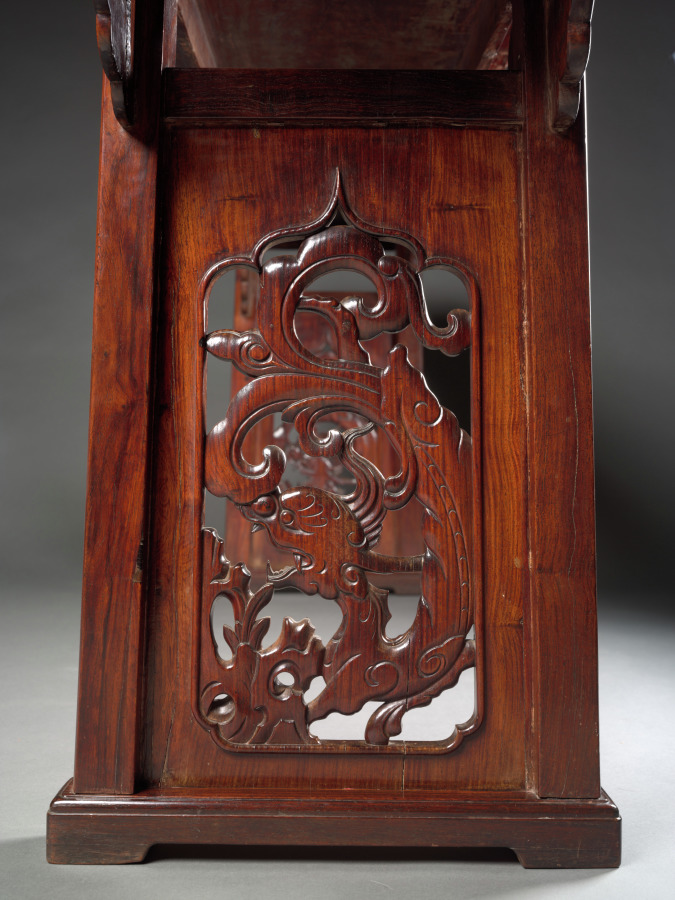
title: Side Table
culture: China, Ming dynasty (1368-1644) or Qing dynasty (1644-1911)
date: 1600s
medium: Rosewood (huanghuali)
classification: Furniture and woodwork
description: Long, rectangular tables were often placed against a wall to hold candlestands, flower vases, or incense burners. It was customary to hang ancestor portraits, images of religious figures, or seasonal paintings above the table that would convey auspicious wishes and blessings to the family. The high legs show stylized cloud-shaped spandrels. At each end of the table, between the recessed legs, are carved openwork panels with a lively dragon motif.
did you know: The table top is made of a single plank of wood.